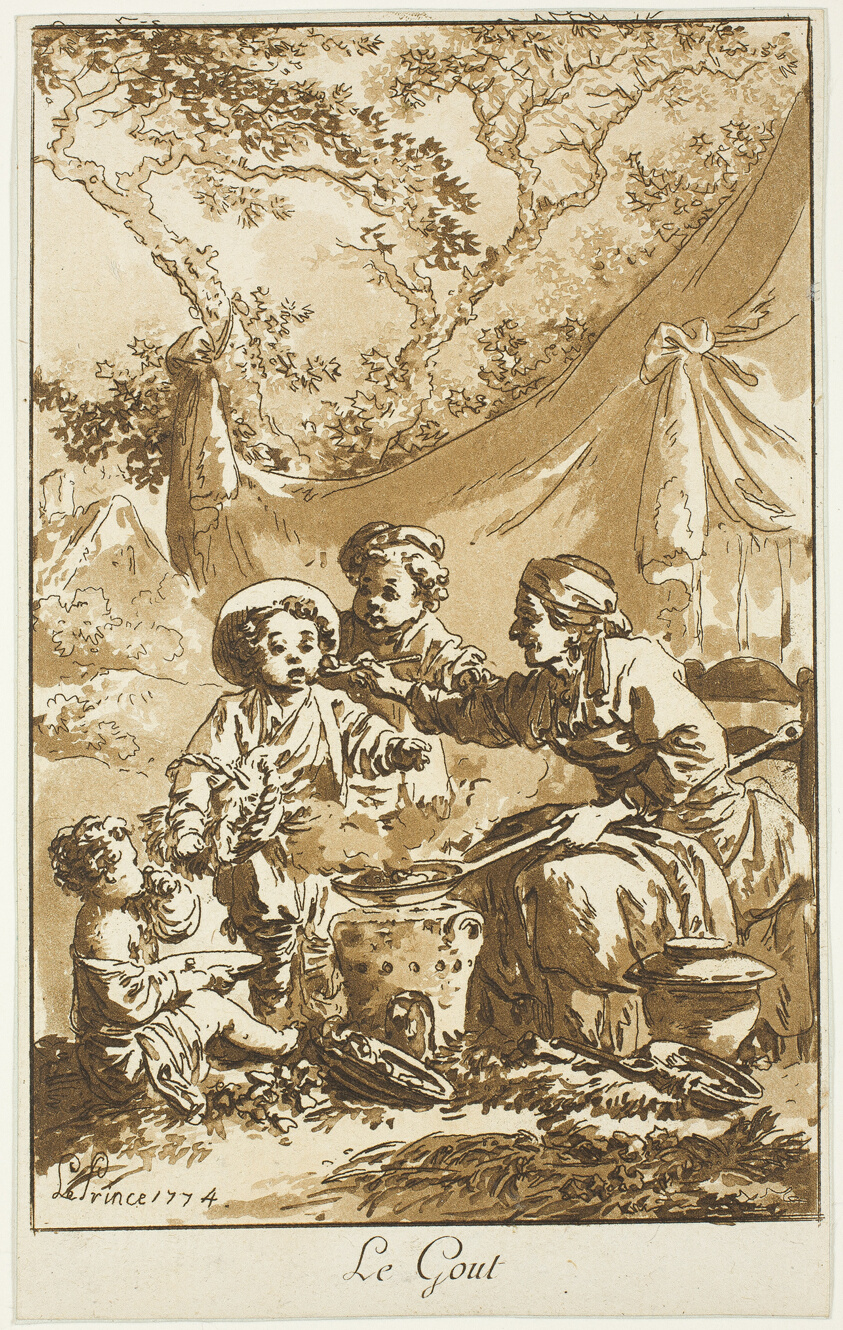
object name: Print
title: Taste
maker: Jean-Baptiste Le Prince; French, 1734-1781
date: 1774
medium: Aquatint and etching on ivory laid paper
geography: France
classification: aquatint; print; prints and drawing